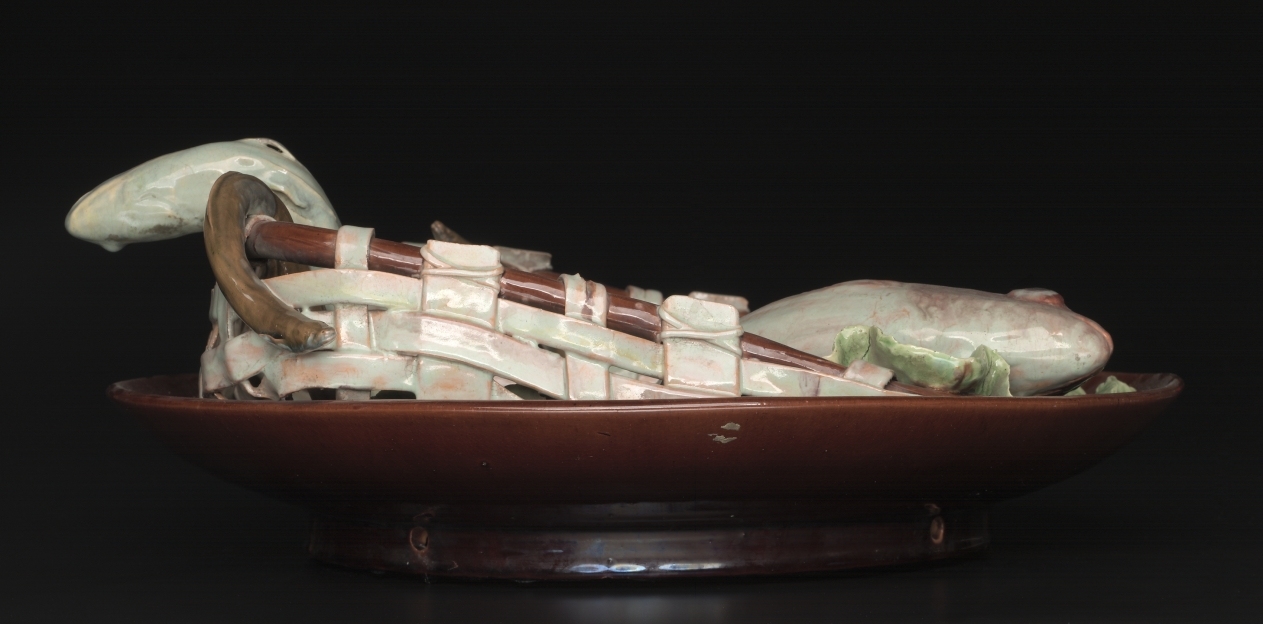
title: Plate with Fish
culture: Portugal, Caldos de Rainha, 19th century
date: 1896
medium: earthenware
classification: Ceramic